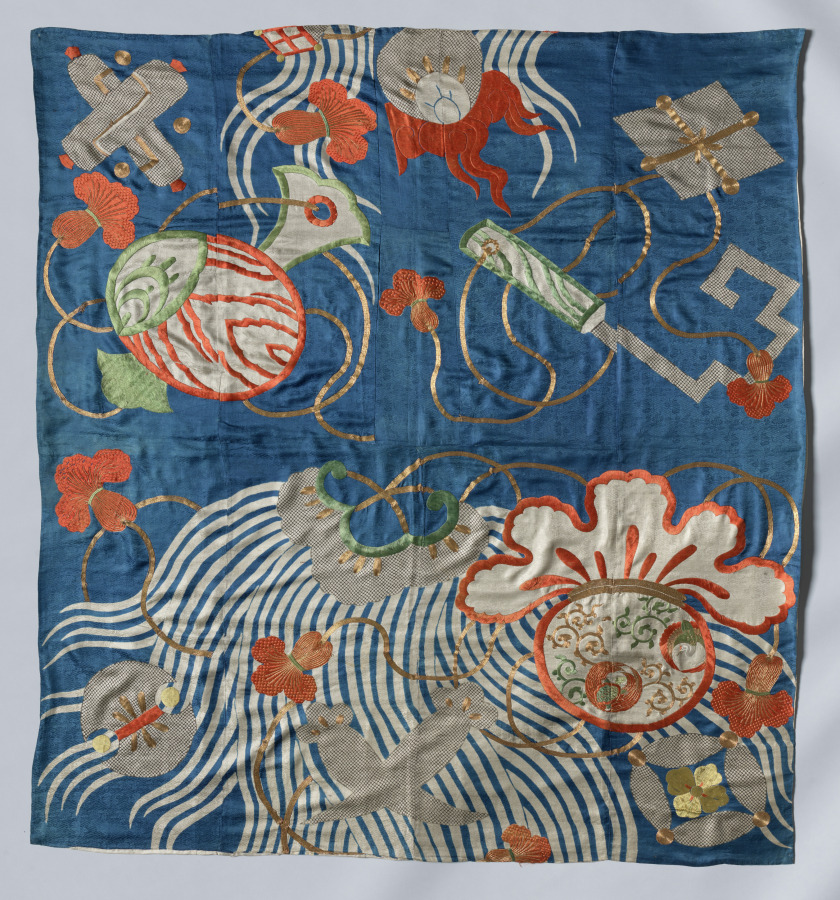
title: Embroidered Silk Square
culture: Japan, Genroku Style (1680-1720)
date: 1680–1720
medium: silk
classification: Embroidery